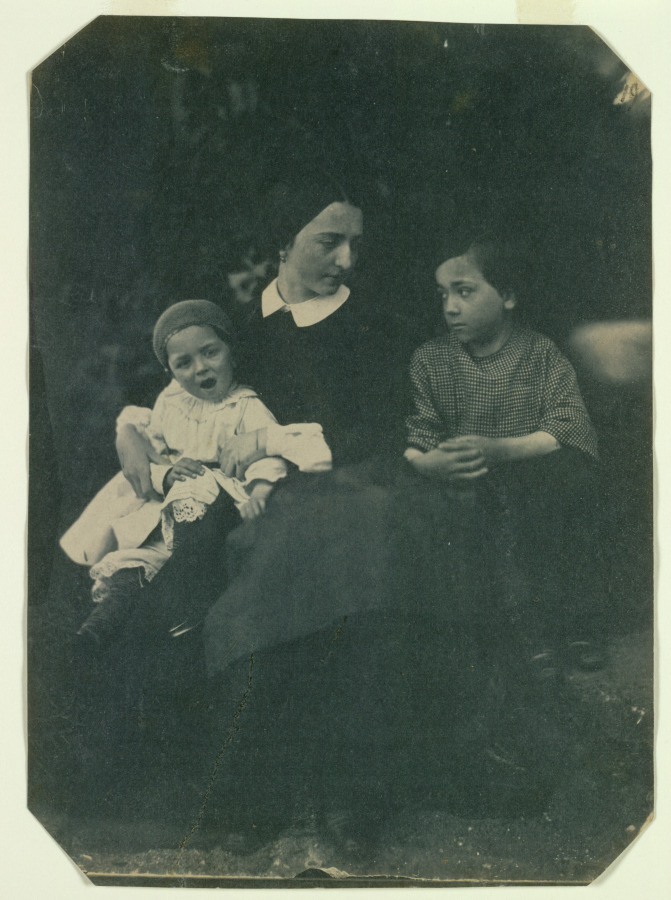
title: Mother with Two Children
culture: France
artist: Jean-Baptist Frénet (French, 1814–1889)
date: c. 1855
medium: salted paper print from a collodion negative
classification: Photograph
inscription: written in black on recto: "19"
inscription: written in pencil on verso: "50/2 [upside down]"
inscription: written in black on verso: "4"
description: After anti-government political activity closed off his professional opportunities as a painter, Jean-Baptiste Frénet took up photography in 1850 and a decade later opened a commercial portrait studio. He preferred simple, plain settings and relied on sitters’ interactions to reveal their personalities and relationships. This family grouping, probably taken for personal pleasure, offers a sense of casual immediacy unusual for the time in both painted and photographic portraiture.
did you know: Frénet was one of the earliest photographers to take spontaneous, rather rigidly formal, portraits.